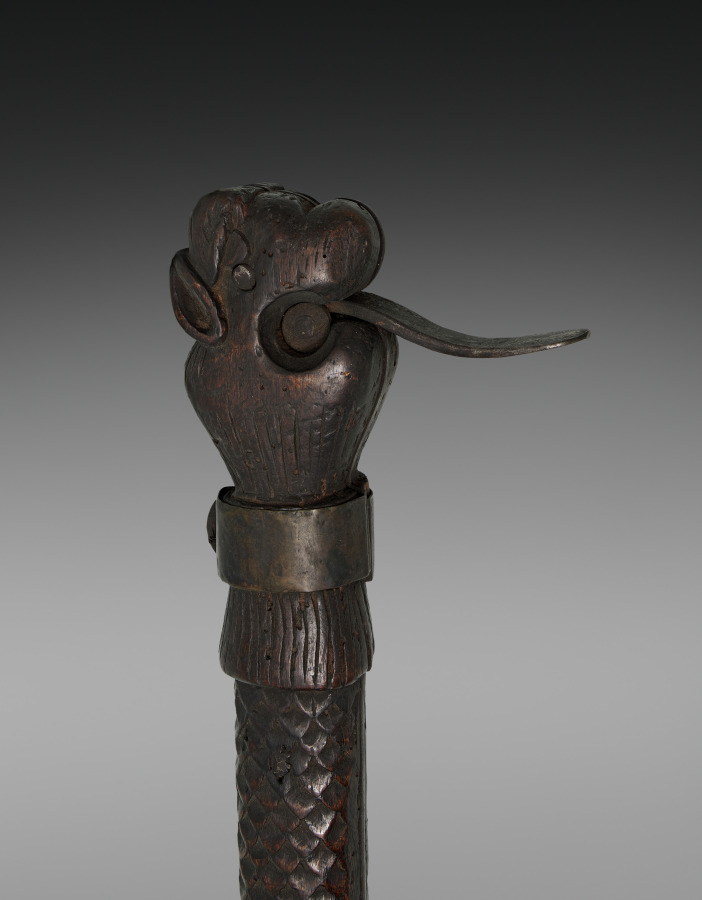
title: Glaive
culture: Italy, 15th century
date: 1400s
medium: plain steel blade, carved wooden haft with protruding tongue of steel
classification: Arms and Armor